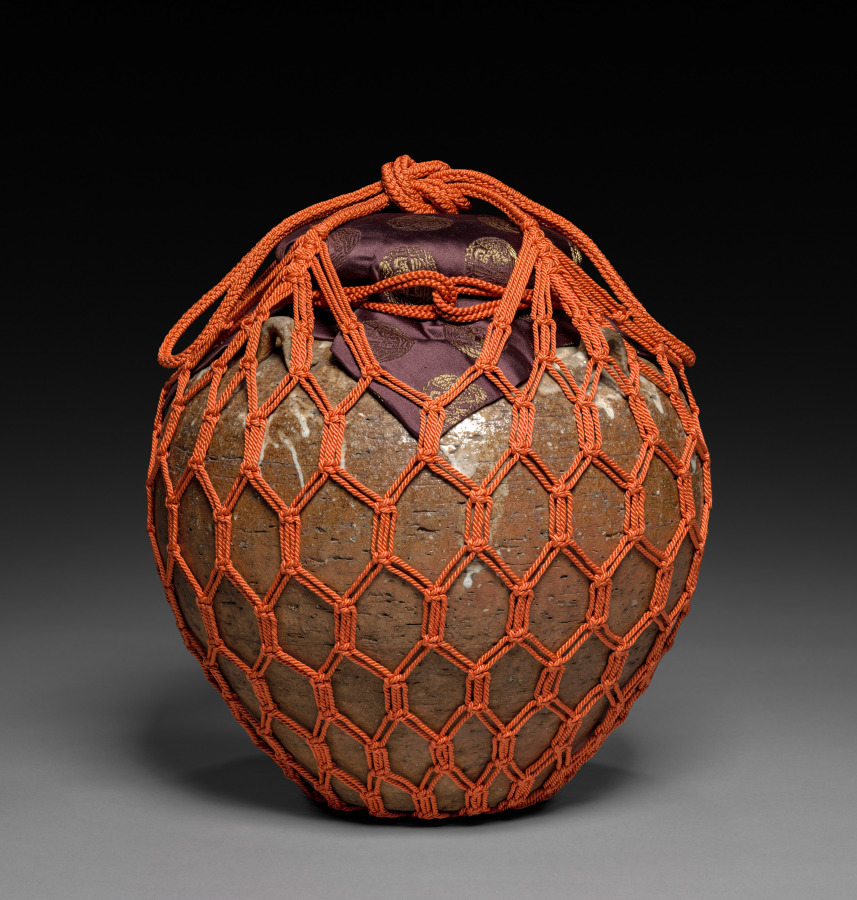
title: Tea Storage Jar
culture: Japan, Edo period (1615–1868)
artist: Nonomura Ninsei (Japanese, active 1640s–90s)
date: mid- to late 1600s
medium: Stoneware with white glaze (Shigaraki style)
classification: Ceramic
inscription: Ninsei seal impressed in the clay on bottom.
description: In this tea storage jar, Nonomura Ninsei reinterpreted a Shigaraki stoneware—made to hold agricultural products and known for its warm orange color, asymmetrical round forms, and irregular natural ash glazes—to produce a more refined piece that would appeal to tea masters seeking a touch of rusticity. In Japanese tea culture, hanging scroll paintings or calligraphy are placed in the tokonoma, or viewing alcove, for participants to admire and discuss along with the utensils used in the gathering. The scrolls are typically paired with vessels containing seasonal floral arrangements.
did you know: This jar may be considered an example of the aesthetic known as kireisabi, or refined rusticity.